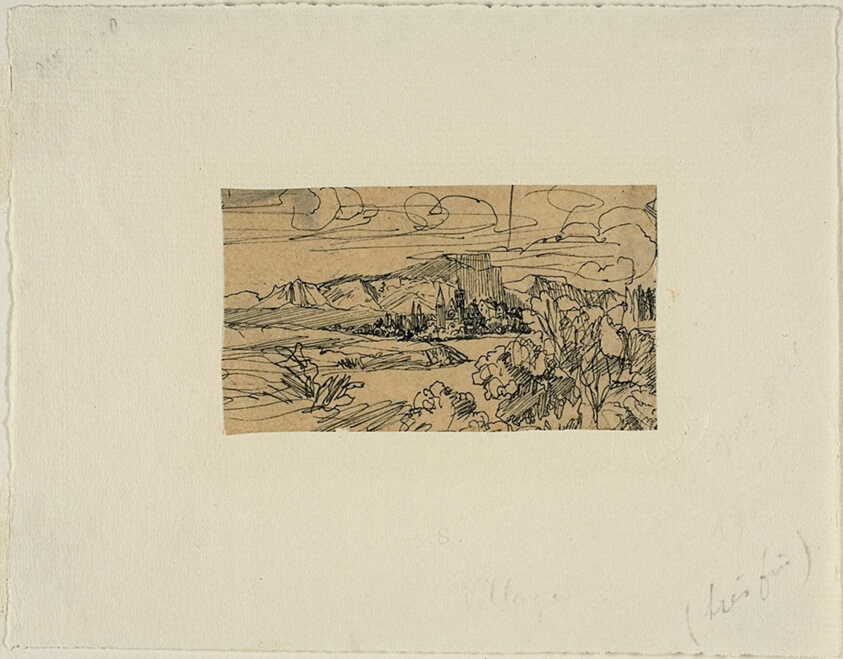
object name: Drawing and Watercolor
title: Cathedral and Village on a Lake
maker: Rodolphe Bresdin (French, 1825-1885)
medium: Pen and black ink, on tan tracing paper, laid down on ivory laid paper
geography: France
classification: pen and ink drawings; drawings (visual works); prints and drawing